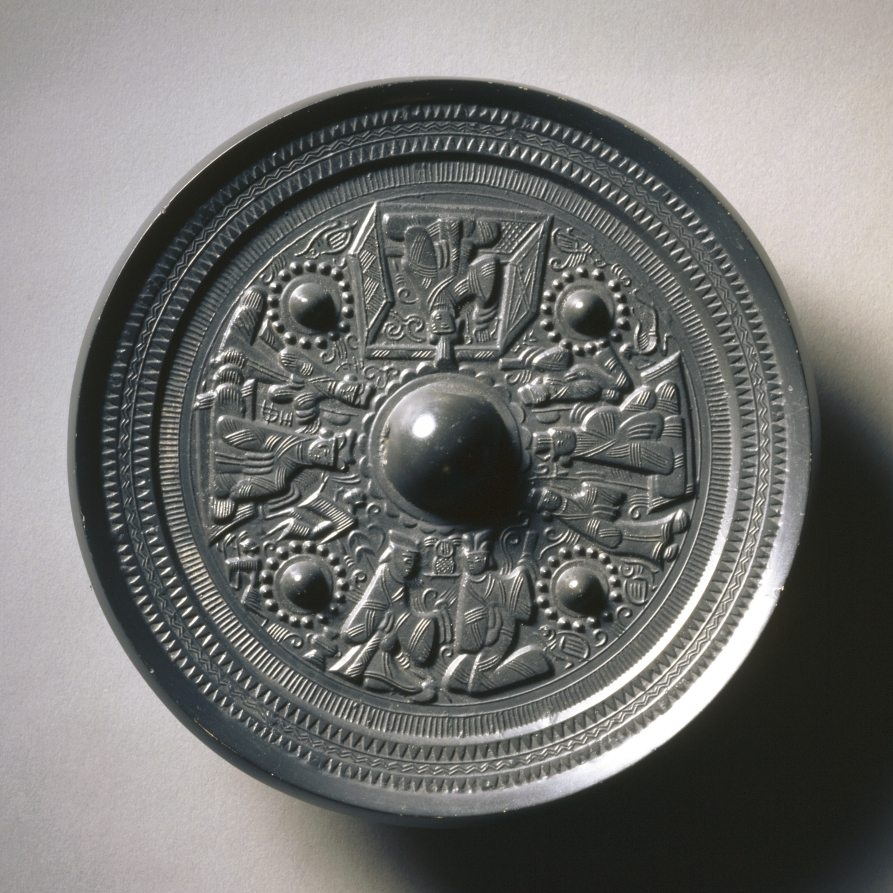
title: Mirror with Deities and Kings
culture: China, Eastern Han dynasty (25–220 CE)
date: 100s CE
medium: bronze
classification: Metalwork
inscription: Queen Mother; King Father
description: Decorated with historic figures from the former states of Wu and Yue, this mirror illustrates the rivalry between the states of Wu (around the Lake Tai basin) and Yue (around Hangzhou Bay) that eventually resulted in the defeat of Wu in 473 BCE. Its downfall became a story retold during the Han dynasty on mirrors from the Shaoxing era. During the relatively peaceful Han dynasty, the number of bronze mirrors used in burials and as gifts increased, as less metal was used for weaponry. Previously known for sword making and having rich metal resources, places like Shaoxing in Zhejiang province became centers of mirror production.